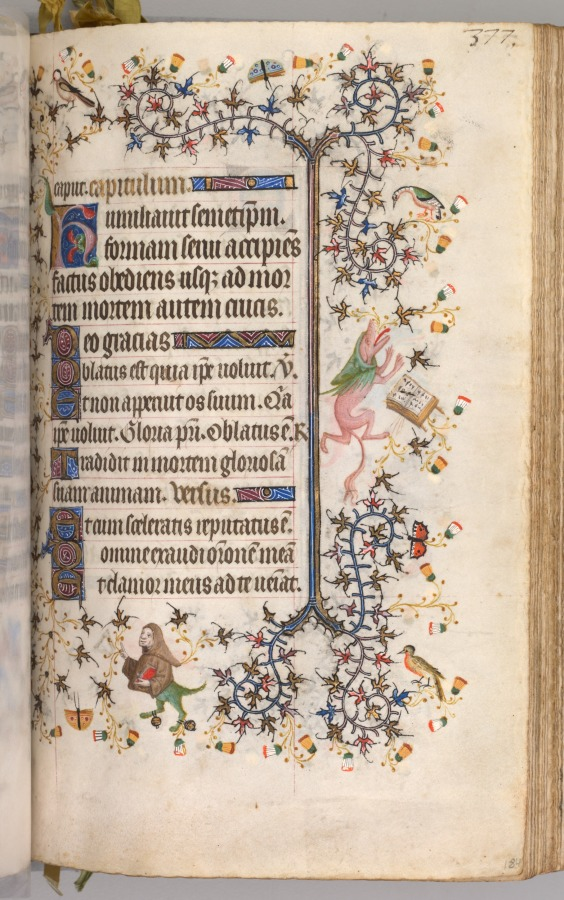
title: Hours of Charles the Noble, King of Navarre (1361-1425): fol. 184r, Text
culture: France, Paris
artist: Master of the Brussels Initials and Associates (French)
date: c. 1405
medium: ink, tempera, and gold on vellum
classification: Bound Volume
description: This precious volume was obviously highly prized by its owner, the French-born King of Navarre, who had his coat of arms painted on no less than twenty folios. Rather than directly commissioning this manuscript from a specific workshop, it seems that Charles the Noble acquired his book of hours -- perhaps ready-made for the luxury market -- while on a trip to Paris in 1404-05. A collaborative effort, six painting styles are evidenced within the pages of this codex, those of two Italians, two Frenchmen, and two Netherlanders. The painter who was responsible for the planning and decoration of the book, and who produced seventeen of the large miniatures, was a Bolognese artist known as the Master of the Brussels Initials. His principal assistant, responsible for most of the borders, was a Florentine who signed his name "Zecho" da Firenze on folio 208 verso.